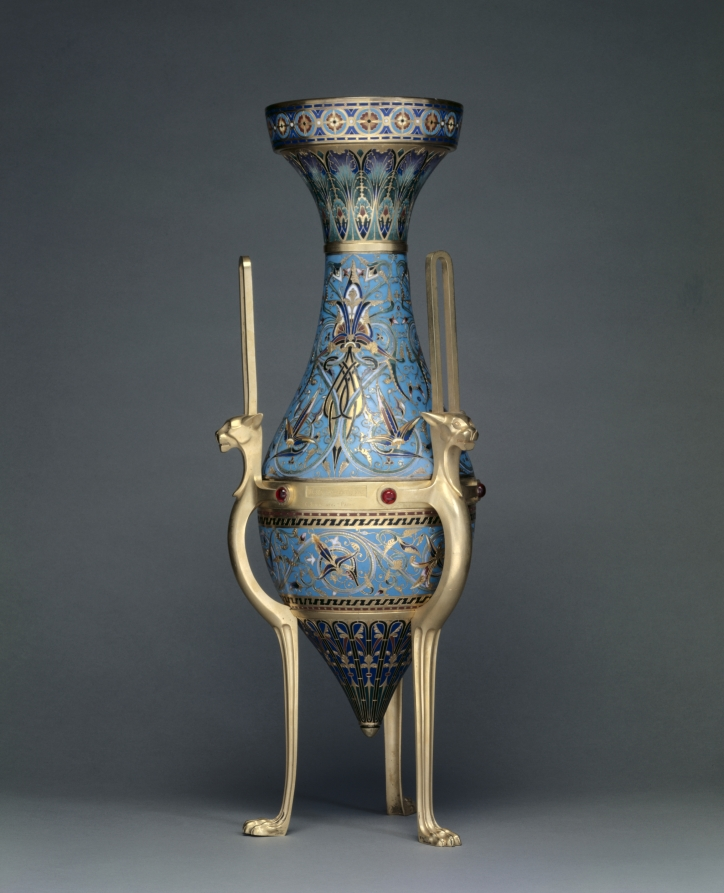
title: Vase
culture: France, 19th century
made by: Firm of Ferdinand Barbedienne (French, 1810–1892)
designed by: Louis-Constant Sévin (French, 1821–1888)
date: c. 1862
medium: gilt bronze with enamel decoration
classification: Metalwork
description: This vase vibrantly encapsulates the admiration for historical works of art and architecture that dominated the 1800s. It features stylistic qualities of ancient Egyptian, ancient Greek, and medieval Islamic art with its cat legs, amphora shape, and spiraling foliage ornamentation. The enameling technique itself, called champlevé, has roots in the ancient world. Champlevé enameling involves carving out sections of metal before filling those areas with colored enamel. The vase model was introduced at the International Exhibition of London in 1862, and its popularity resulted in several color and shape variations.